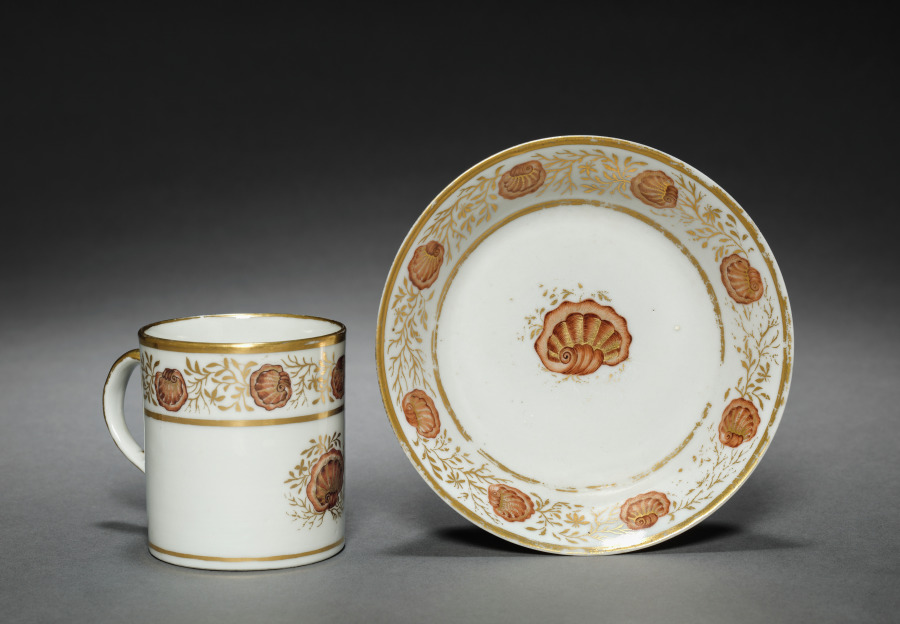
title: Cup and Saucer from Oliver Wolcott, Jr. Tea Service (5 of 6)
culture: Chinese Export porcelain, late 18th-early 19th century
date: 1785–1805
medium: porcelain, sepia enamel, gold leaf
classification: Ceramic